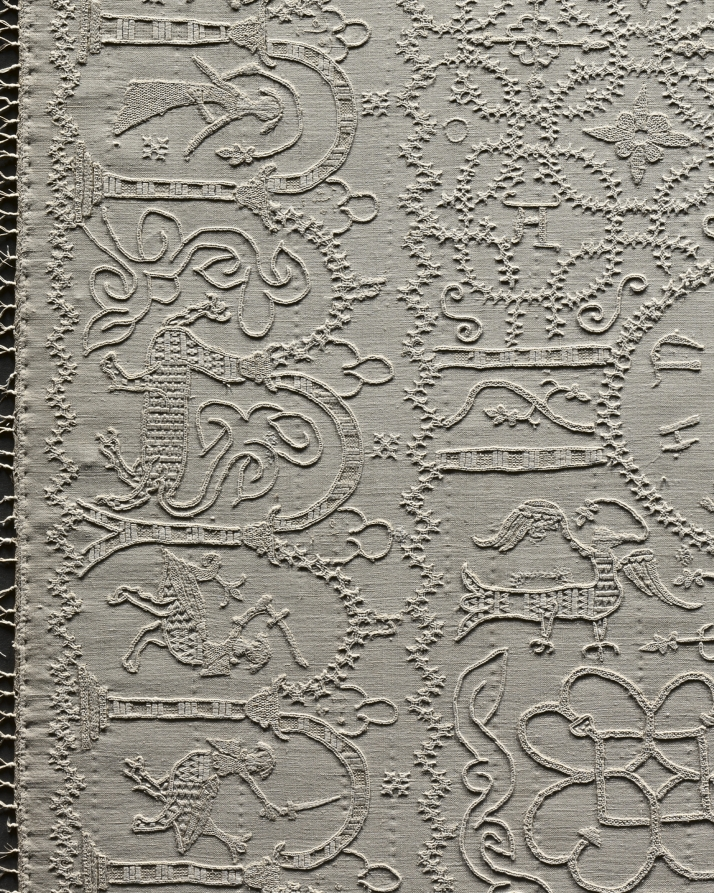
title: Altar Cloth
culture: Germany, Altenberg on the Lahn, Premonstratensian Convent, 14th century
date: c. 1350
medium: embroidery: linen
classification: Embroidery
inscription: various motifs enclosed in quatrefoils with identifying inscriptions in Gothic letters.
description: This large, embroidered altar cloth is one of the rarest, most important medieval church furnishings in existence. It was stitched by nuns in the Premonstratensian Convent in Altenberg on the Lahn River, north of Frankfurt, Germany, and was used to cover the church’s high altar in the weeks leading up to Easter. The cloth is an example of linen embroidery, a specialty of German nuns in the later Middle Ages. The Altenberg monastery church once had valuable furnishings; the high altar retable (a decorated frame with sculptures and paintings on the top of an altar) has survived, the main parts of which are now in the Städel Museum in Frankfurt, Germany.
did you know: When lit from behind, the previously hidden details emerge and the complex design becomes evident.